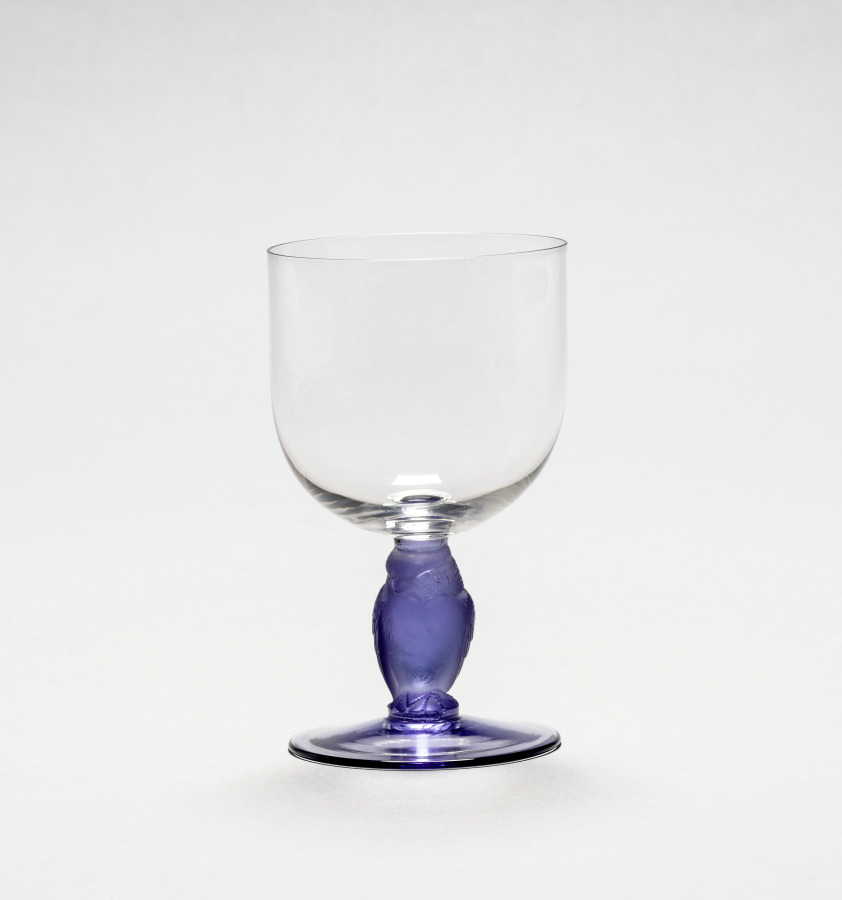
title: Raptor Goblet (Verre rapace)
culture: France, 20th century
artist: René Lalique (French, 1860–1945)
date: c. 1929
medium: Cast and blown glass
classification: Glass